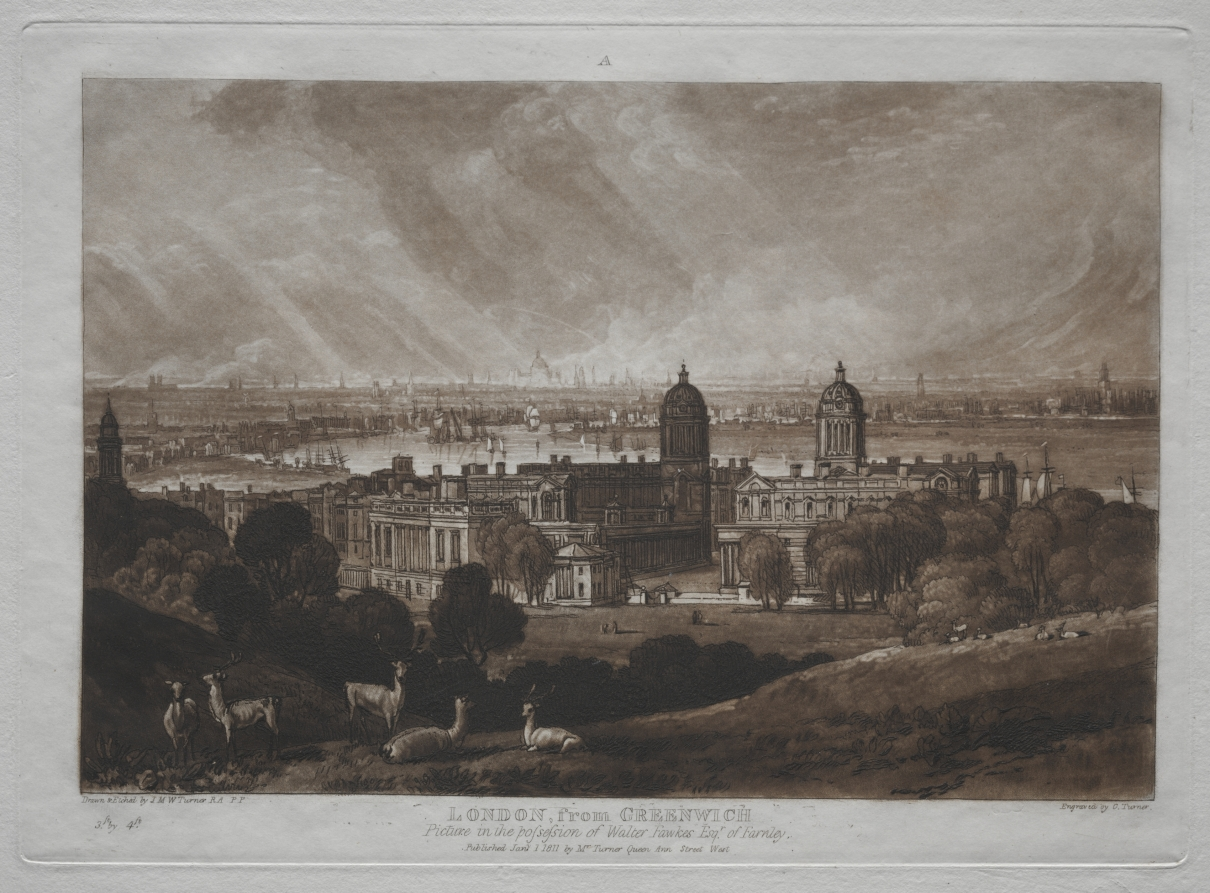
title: Liber Studiorum: London from Greenwich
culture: England, 19th century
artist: Joseph Mallord William Turner (British, 1775–1851)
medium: etching and mezzotint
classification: Print